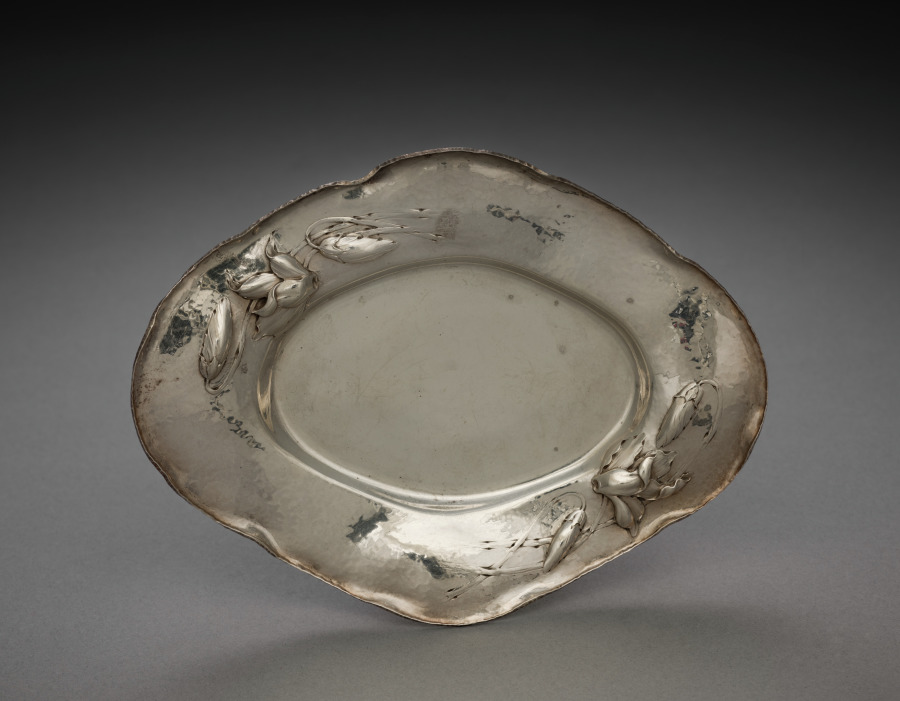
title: Sauce Boat and Tray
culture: America, Rhode Island, 19th century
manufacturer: Barbour Silver Company (American)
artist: attributed to William Christmas Codman (British, 1839–1921)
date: c. 1890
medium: silver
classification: Silver